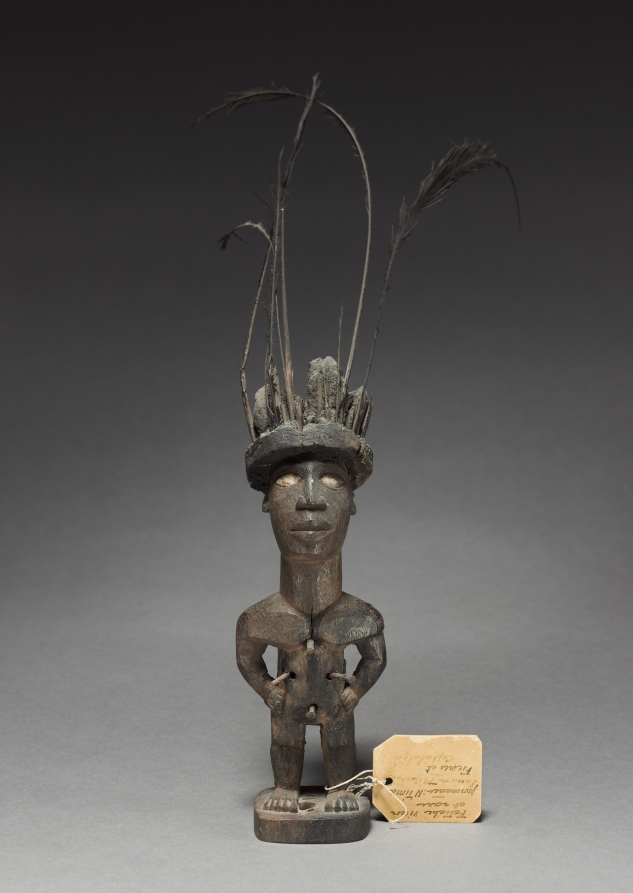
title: Power figure (nkisi)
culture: Africa, Central Africa, Republic of the Congo, Kongo-style maker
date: late 1800s–early 1900s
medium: Wood, feathers, organic material (including resin), iron, and possibly porcelain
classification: Sculpture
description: This figure had lost its nkisi load on the belly, but now shows how the mixture of earth, resin, leaves, glass, and other items was fixed onto the wooden figure, supported by four nails. It had been the property of “the sorcerer of Mboukou.”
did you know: This niksi figurine shows how the mixture of earth, resin, leaves, glass, and other items was fixed. It had been the property of “the sorcerer of Mboukou.”